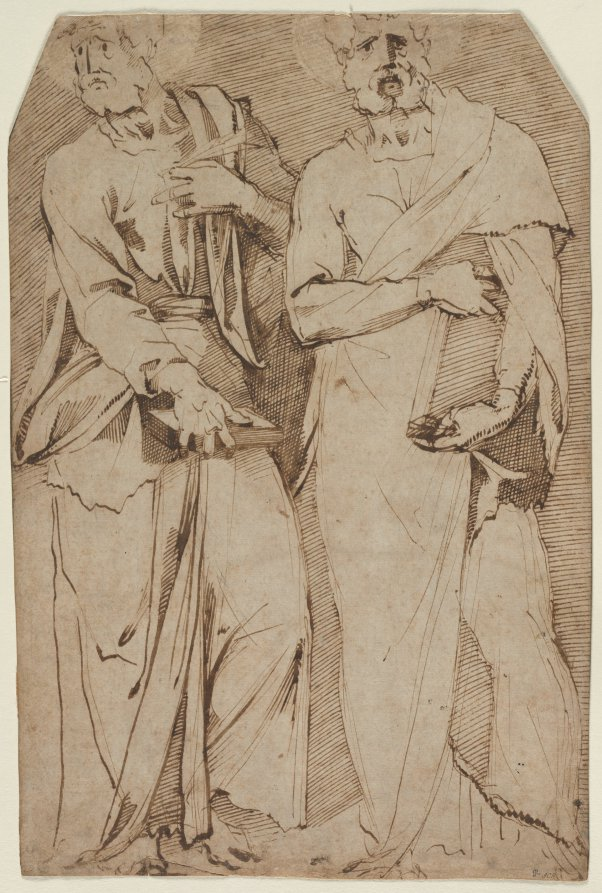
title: Two Standing Saints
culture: Italy, 16th century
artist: Giovanni Bandini (Italian, c. 1540–1599)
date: 1563–1572?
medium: pen and brown ink with traces of black chalk (abraded in haloes); traces of framing lines in black ink and gold paint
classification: Drawing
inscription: VERSO, center, in graphite: 183. Baccio Bandinelli 1487 - 1559. / ex. coll. Richardson, Ottley, Lawrence. / (M. Ottley attribua ce dessin à donatello d ' en / fitgraver un facsimile sur Vivarès sous / ce nom. ; lower center, in graphite: 271